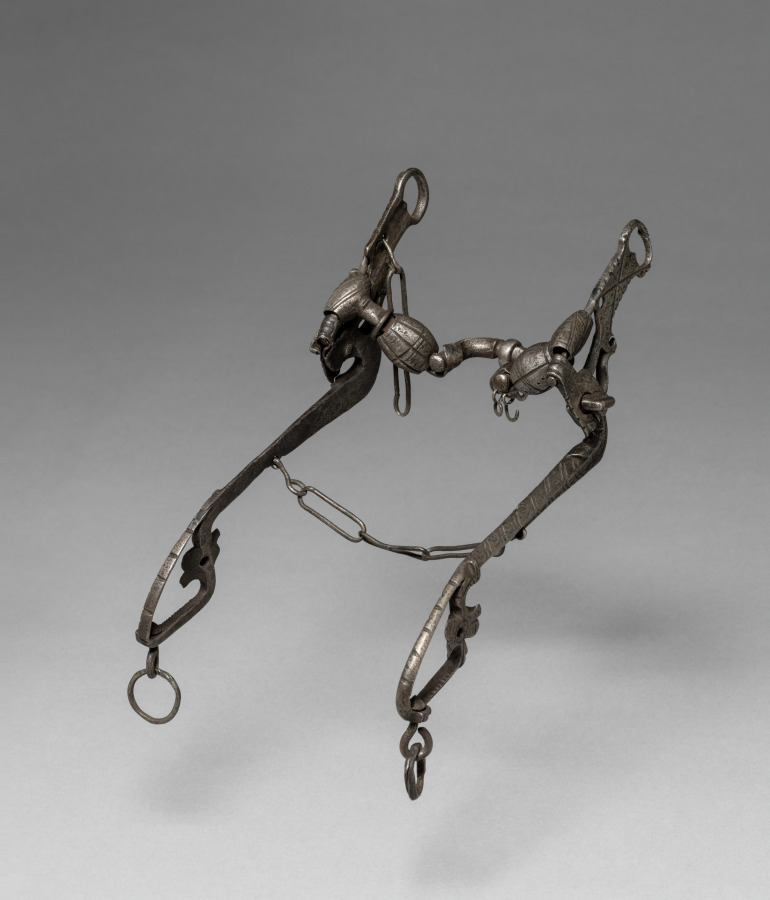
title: Curb Bit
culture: Germany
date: c. 1535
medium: steel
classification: Arms and Armor